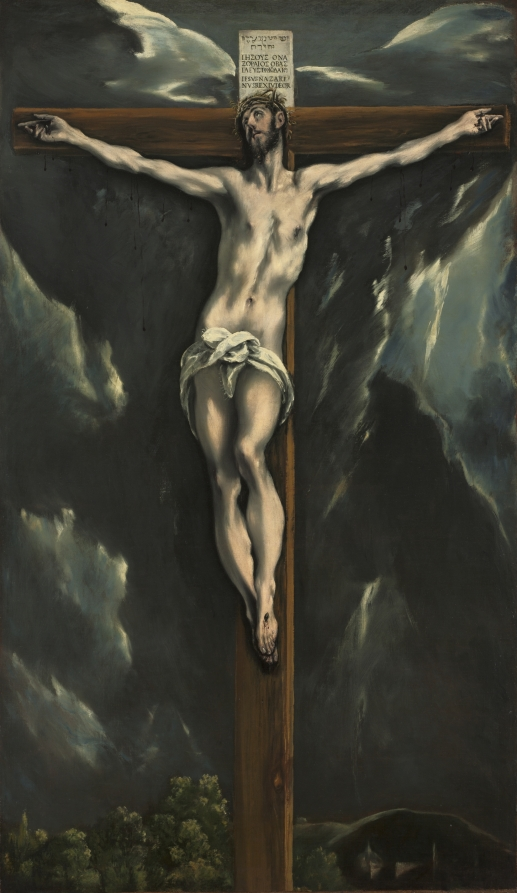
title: Christ on the Cross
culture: Spain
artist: El Greco (Spanish, 1541–1614)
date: c. 1600–1610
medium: oil on canvas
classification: Painting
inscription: Inscription on plaque at top of cross, in Hebrew, Greek and Latin: Jesus of Nazareth, King of the Jews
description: El Greco (Spanish for "the Greek") was trained on his native island, Crete, as a painter of small-scale devotional images (icons). In the late 1560s he moved first to Venice, where he may have worked with Tintoretto (1518-1594), and then to Rome. Finally, he settled in Toledo, Spain. Tintoretto's influence is visible here in the colors and in the elongated figural proportions. The graphic depiction of blood, however, may reflect the Spanish interest in Christ's sufferings as a subject for meditation.